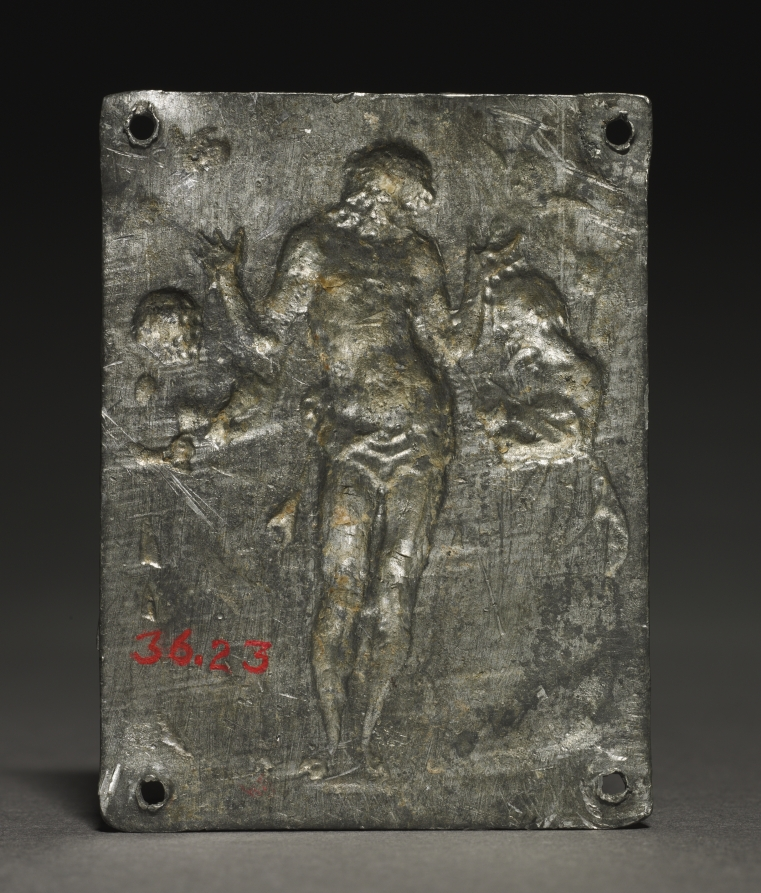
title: Ecce Homo (Behold the Man)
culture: Italy, Milan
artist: workshop or follower of Antonio Abondio (Italian, 1538–1591)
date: c. 1600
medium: lead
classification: Sculpture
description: Mass-produced plaquettes like this work offered high quality devotional images for private use. The Latin title of this work, according to the Gospel of John (19:1-5), refers to the words that were spoken by Pontius Pilate, the Roman governor of Judea, when he presented Christ, scourged and crowned with thorns, to the assembled crowds shortly before the Crucifixion. Here a full-length Christ reveals his wounds before angels who collect his blood in chalices, encouraging meditation on his suffering.